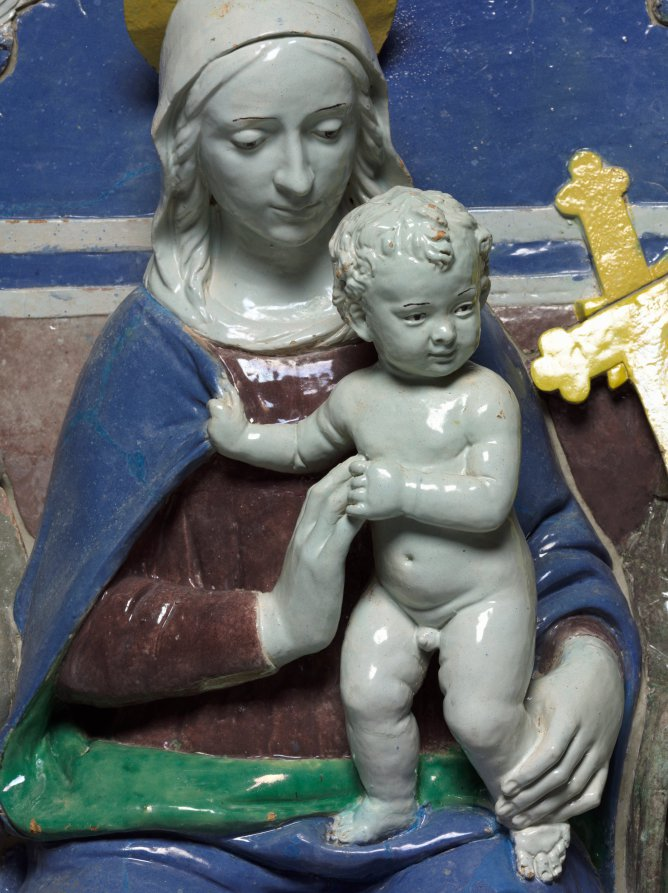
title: Virgin and Child Enthroned with Saints Francis and Giovanni Gualberto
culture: Italy, Florence, 16th century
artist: Benedetto Buglioni (Italian, 1461–1521)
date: c. 1510–20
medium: glazed terracotta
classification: Sculpture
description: The Madonna sits upon a throne with the Christ child standing on her knee. He is steadied by his mother, turning delicately to grasp her robe for support. On the left is Saint Francis, identified by his stigmata. On the right, Saint Giovanni Gualberto is identified by his monk's robe and distinctive processional cross. The brown robes of the saints, the purple of the Virgin's tunic, and the flesh tones of the figures contrast strongly against the bright blue background. In the semicircular sky behind the figures, three winged cherub heads emerge, representing a host of angels. Glazed terracotta is both durable and decorative and the gleaming white of this piece would have stood out in the darkness of a church. The medium was made popular by Renaissance artist Luca della Robbia and came into fashion as a substitute for expensive carved marble. A rounded arch frame embellished with fruit and flower garlands as well as egg-and-dart and cord moldings accompanied the work when it was acquired, but was later determined not to be original and removed. Buglioni's work bears the influence of the della Robbias, particularly in the simple color scheme. Buglioni likely worked in the studio of Luca's nephew, Andrea, where he would have learned the technique of glazing terracotta.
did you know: The unusual purple hue is particular to the artist.